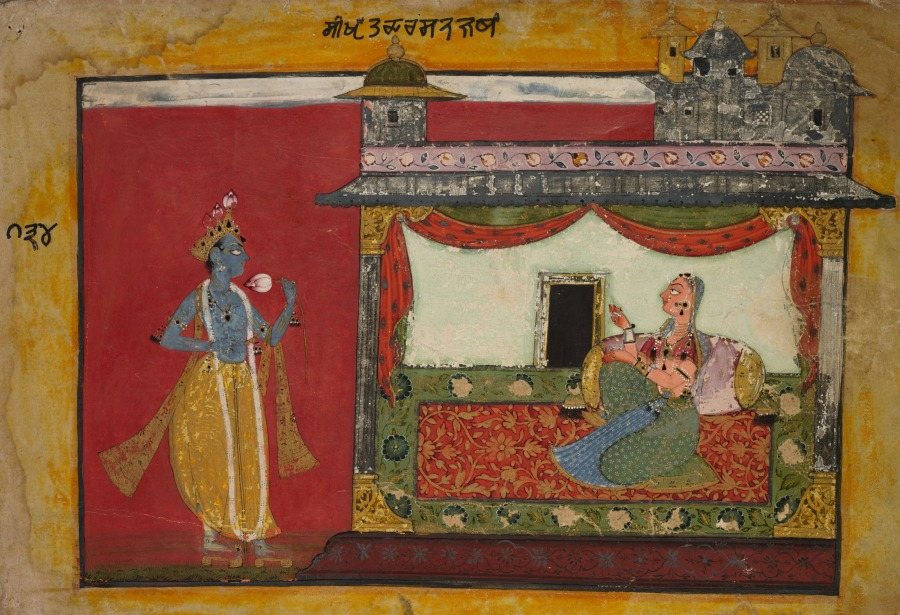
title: The Approach of Krishna. Page from a Rasamanjari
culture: Northern India, Pahari kingdoms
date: c. 1660–70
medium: Gum tempera, ink, silver, gold, and beetle wings on paper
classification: Painting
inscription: "Friend give up your waywardness of mind. O dear friend do not torture me with your shyness. For a moment, the lord Kama forgive me, be steadfast in your gaze. May the handsome Krishna wearing peacock feathers on his head, putting lotus in his ears and holding the flute on his hand reveal himself to me now." (translated by Moti Chandra and Anand Krishna)" Inscriptions: (on left border) number 135; (above) sakshat darshana -"Seeing the lover face to face"; (reverse) Sanskrit text - see W. G. Archer, 1973, 1: 39.